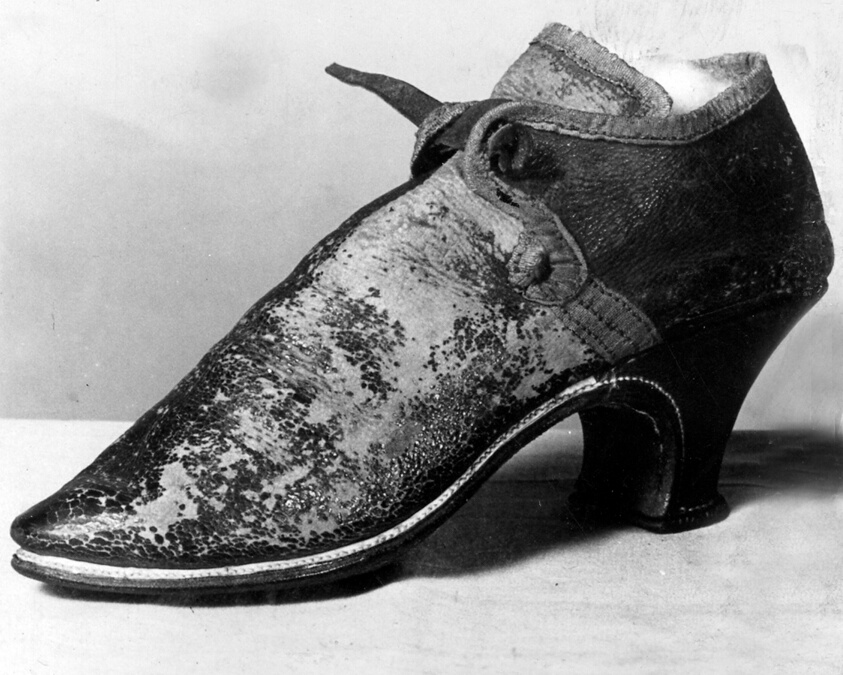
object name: Costume and Accessories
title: Woman's Shoe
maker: England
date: 1801/25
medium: Leather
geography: England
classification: textile; shoes - misc; costume accessory - shoe; costume; dress (garment); clothing